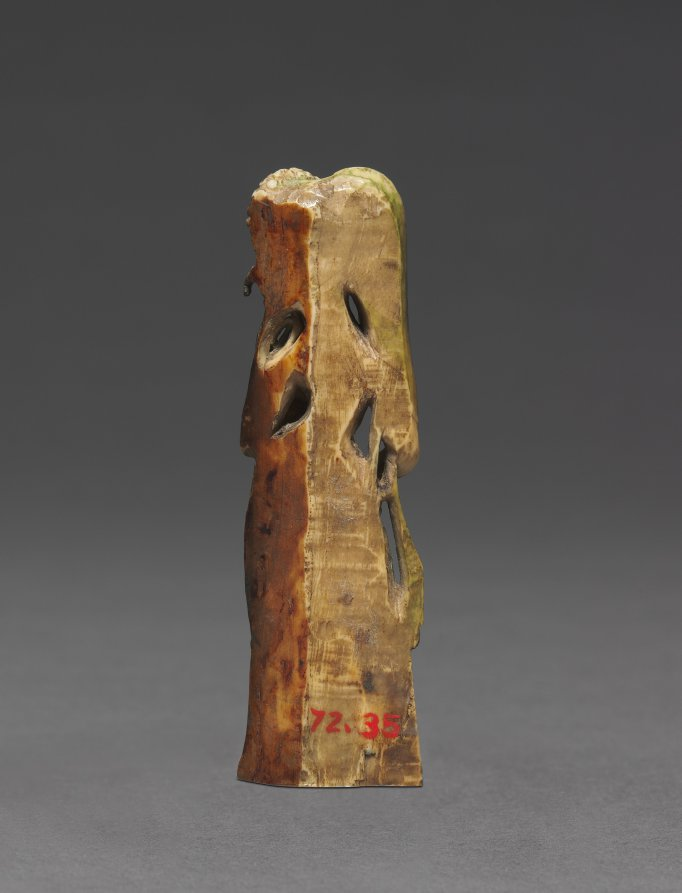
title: Female Attendant Bearing a Lotus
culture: India, Kashmir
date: 700s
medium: ivory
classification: Ivory